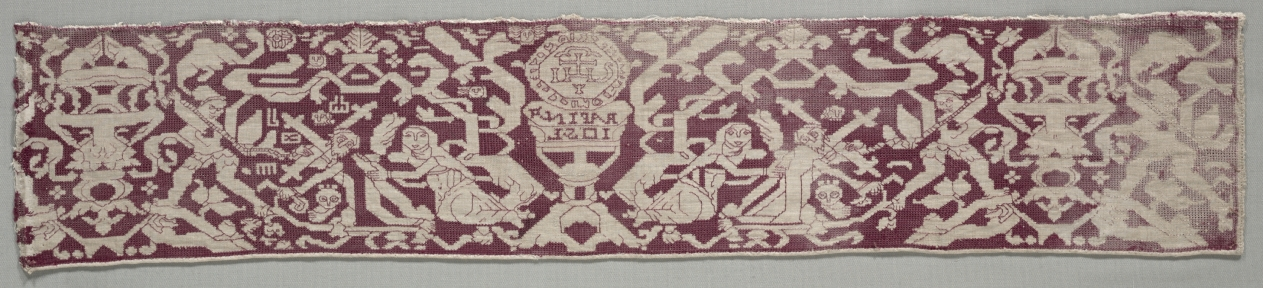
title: Embroidered Border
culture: Italy, 16th-17th century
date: 1500s-1600s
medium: embroidery; silk on linen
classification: Embroidery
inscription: "I.H.S." and below this a name embroidered backwards, "R A. FINA IDSE."